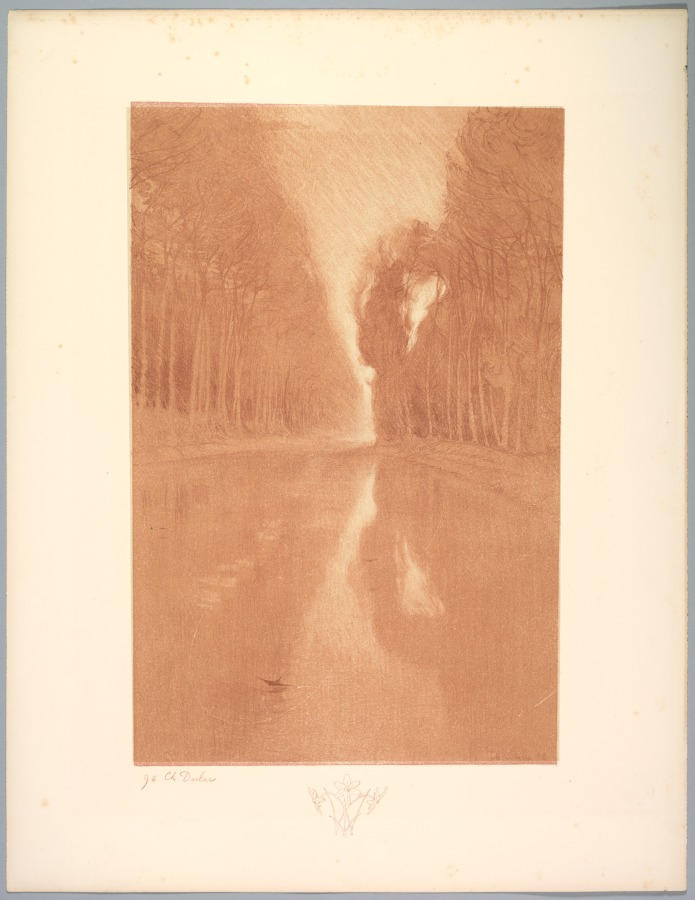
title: Suite de Paysages: Landscape, Plate 2, Remarque, Starflowers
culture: France, 19th century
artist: Charles Marie Dulac (French, 1865–1898)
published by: Printer: Bellefond (per colophon)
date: 1892–1893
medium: color lithograph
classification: Print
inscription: Below image, left, in reddish brown pencil: 96 Ch. Dulac In plate, within lower right image: Ch. Dulac, t.2 Below image, right, blindstamp: IMPRIMERIE BELEFOND & CIE PARIS in oval